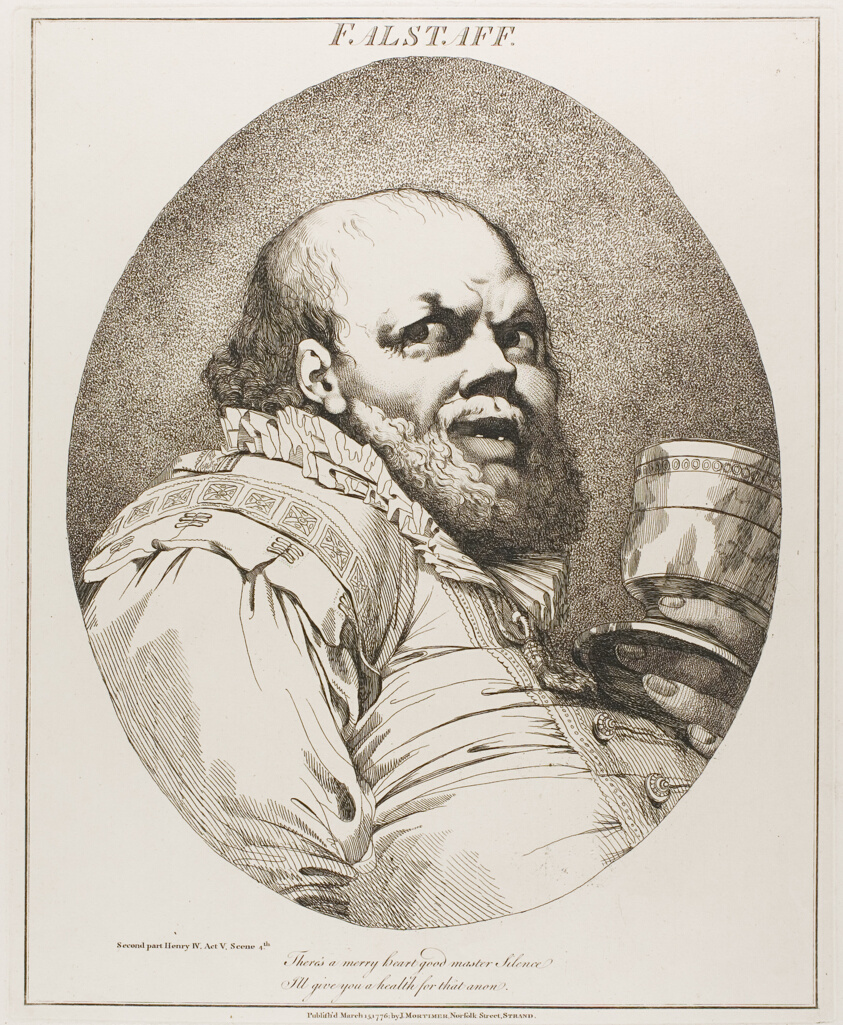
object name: Print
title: Falstaff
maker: John Hamilton Mortimer (English, 1740-1779)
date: originally published March 15, 1776, published 1809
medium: Etching on cream wove paper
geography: England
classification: etching; print; prints and drawing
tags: Henry IV, part II, literature, prints and drawings